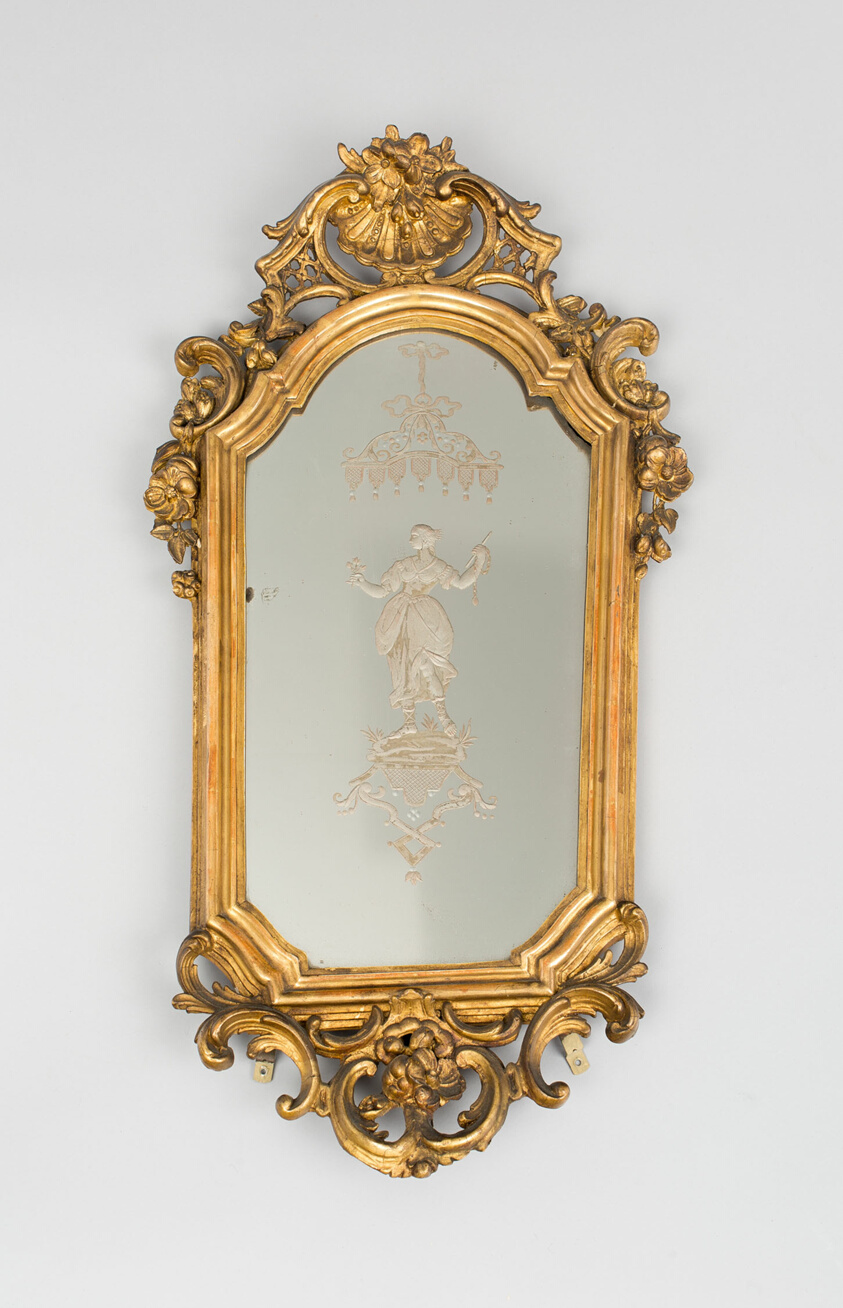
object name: Furniture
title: Mirror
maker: Venice, Italy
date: Mid 18th century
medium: Gilded wood, engraved mirror glass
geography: Venice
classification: mirror; furniture; european decorative arts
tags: furniture